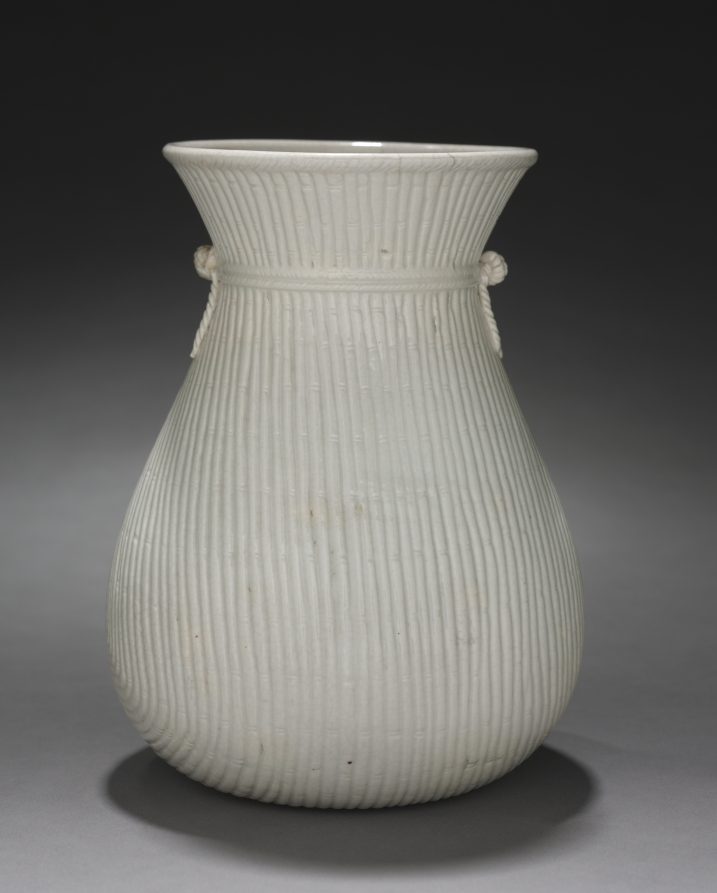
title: Basket Shaped Vase: Ding Ware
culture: China, Ming dynasty (1368–1644)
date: 1600s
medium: glazed porcelain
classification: Ceramic